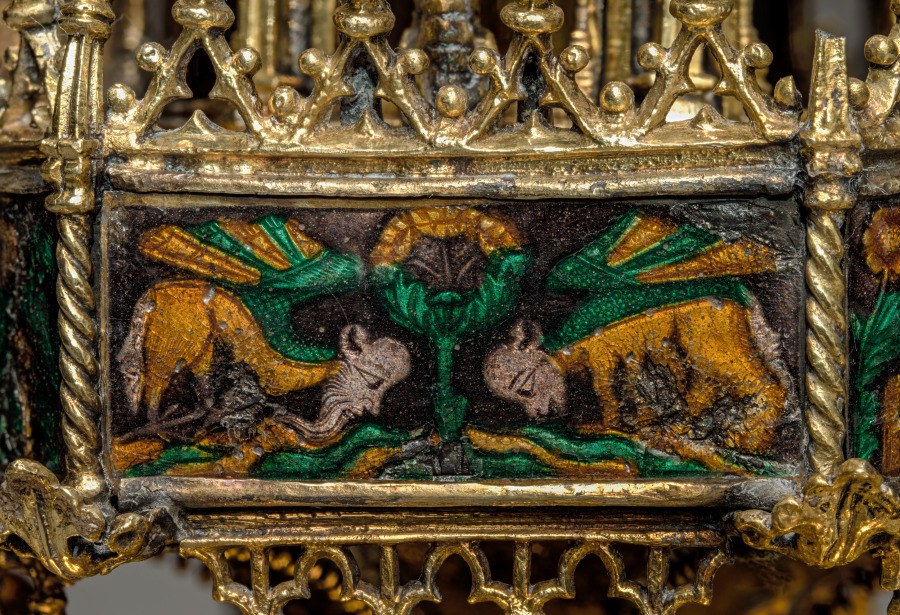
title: Table Fountain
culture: France, Paris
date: c. 1320–40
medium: gilt-silver and translucent enamels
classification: Metalwork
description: Conceptually and stylistically, this object is beyond all else a piece of Gothic architecture in miniature with vaults, pinnacles, columns, and traceried arches. Though the artist who created it is unknown, he was unquestionably inspired by the great Gothic buildings of his time. The table fountain is a three-tiered assembly combining cast elements with bent sheets of gilt-silver. To these have been attached a series of enamel plaques representing grotesque figures, some of which play musical instruments. Water wheels and bells were added to capture motion and sound. The rich detail, precious materials, and involved ornamentation of this deluxe object suggest it would have been expensive to produce and highly treasured by its original owner, someone of high status, and would have been deployed as an object of spectacle. This is the most complete example of its type known to survive from the Middle Ages. Medieval inventories reveal that small fountains like this, often taking various forms, and generally made from precious metals, once existed in large numbers, thus making the Cleveland table fountain an extremely rare object.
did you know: This fountain with its minute architectural details and finely made enamel plaques displayed the wealth and refinement of the owner as it entertained his guests. Imagine hearing the ringing of the tiny bells when this fountain was in use.